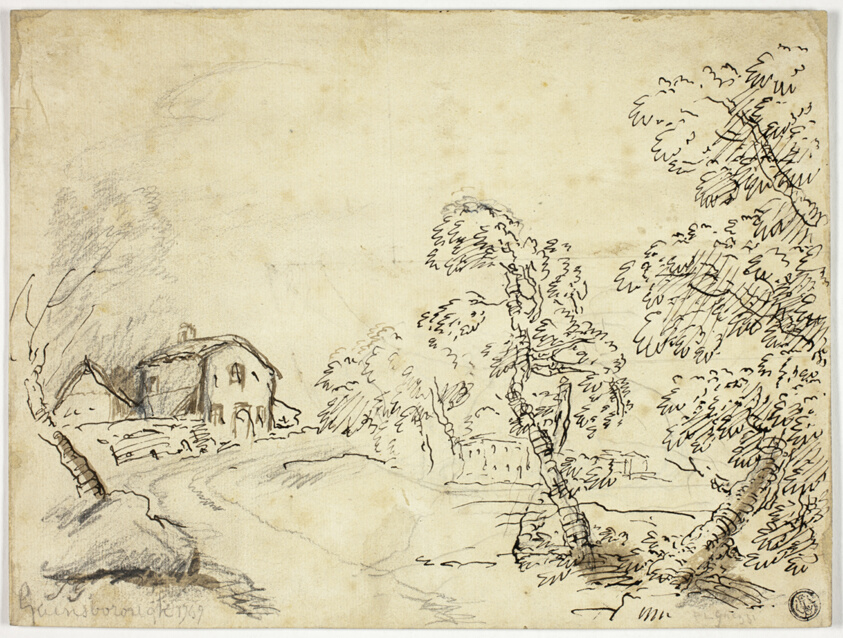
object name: Drawing and Watercolor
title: Italianate Landscape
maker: Style of John Skippe (English, 1742-1811); or Thomas Gainsborough (English, 1727-1788); or Pier Leone Ghezzi, (Italian, 1674-1755); or style of Baron Coplestone Warre Bampfylde (English, 1720-1791)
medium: Pen and black ink, with graphite, brush and brown wash, and touches of pen and brown ink, on cream laid paper, laid down on cream laid paper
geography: England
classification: pen and ink drawings; drawings (visual works); prints and drawing